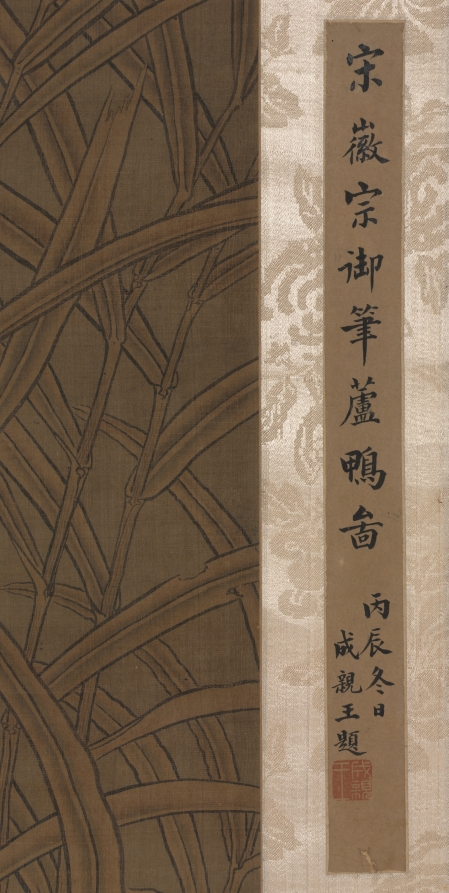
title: Ducks under Reeds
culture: China, Ming dynasty (1368–1644)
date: 1400s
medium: hanging scroll, ink and color on silk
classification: Painting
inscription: 1 label on mounting, dated 1796, by Yong Xing 永瑆 (Prince Cheng 成亲王, 1752-1823)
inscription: 7 seals: 1 of Song Luo 宋犖 (1634-1713); 1 of Gong Erduo 宮爾鐸 (b. 1838); 5 unidentified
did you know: The artist realistically represented that the Mandarin duck is a sexually dimorphic species, meaning males and females differ in appearance.